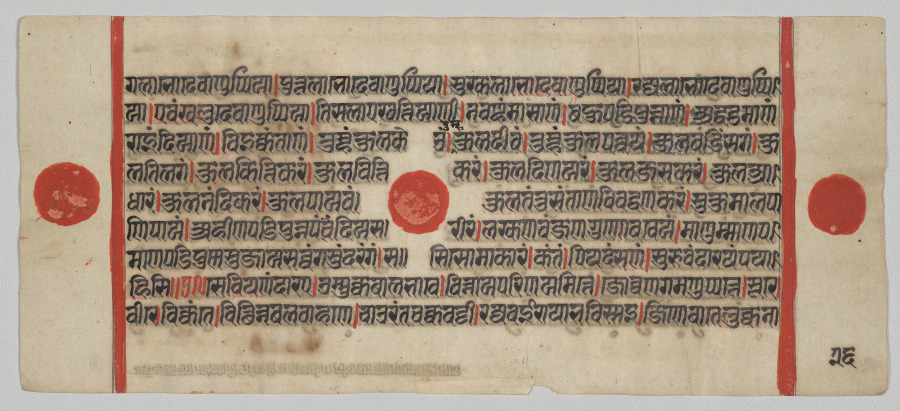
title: Text, Folio 26 (verso), from a Kalpa-sutra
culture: Western India, Gujarat, last quarter of the 15th century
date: c. 1475–1500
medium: Gum tempera, ink, and gold on paper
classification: Painting